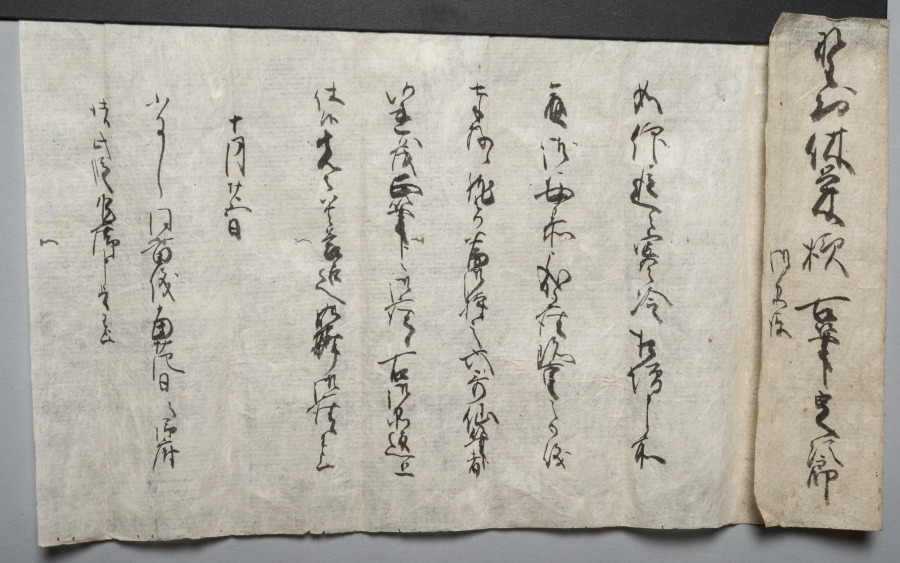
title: Section of an Illustrated Tale of Genji Poetry Contest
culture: Japan, Muromachi period (1392–1573)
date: 1400s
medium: section of a handscroll mounted as a hanging scroll; ink on paper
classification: Painting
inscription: 四十六番 左 ひげくろの大将 心さえ空にみだれし雪の［も」夜に ひとりさえつるかたしきの袖／ 四十七番 うきことを思ひさわ げばさまざまに くゆるけむりぞ いとど たち そふ／ 四十八番 すがくれてかず にも あらぬ かりのこを いづかたにかはとりかくすべき／ 右 雲井のかり かぎりとてわすれがたきを わするるも こや世に なびくこころな るらむ／ あさきなを いひ ながしける かわ ぐちは いかが もらしし せきのあらがき／ あわれをもいかに しりてか なぐさ めむ あるや 恋しき なきや かなしきに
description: This hanging scroll was once part of a handscroll depicting a waka (thirty-one syllable verse) poetry contest between characters from the 11th-century literary classic Tale of Genji. In this section, a woman known informally as Kumoi no kari, or “Goose in Fog,” after a lovelorn line she hums in the novel, is pitted against Higekuro no taishō, or “General Blackbeard.” Three of his poems, numbered 46 to 48, from “The Handsome Pillar” chapter appear over his image. The subsequent three poems inscribed above Kumoi no kari are presented as her “responses,” and come from "The Plum Tree Branch", “New Wisteria Leaves”, and "Evening Mist" chapters.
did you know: General Blackbeard laments having smelly ash poured upon him by his angry wife in one of the poems.